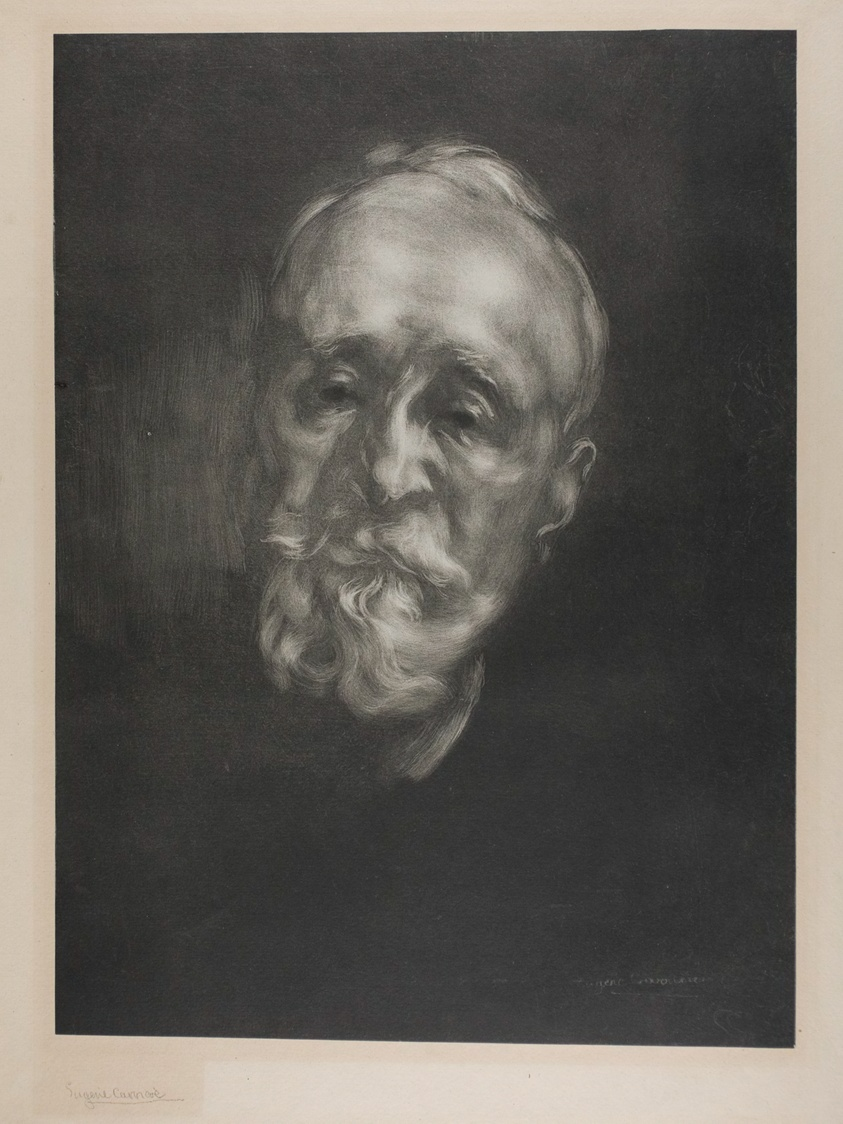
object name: Print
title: Portrait of Puvis de Chavannes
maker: Eugène Carrière (French, 1849-1906)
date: 1897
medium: Lithograph in black on China paper laid down on heavy buff wove paper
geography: France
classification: lithograph; print; prints and drawing